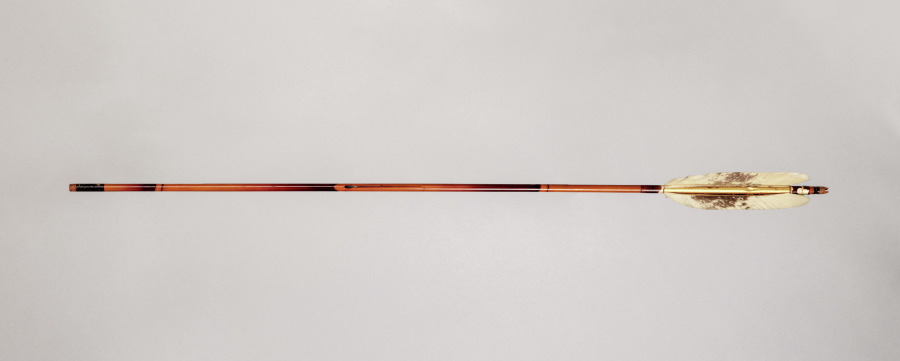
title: Arrow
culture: Japan, Edo period (1615–1868)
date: 1700s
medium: bamboo shaft tipped with wooden point and heeled with pheasant feathers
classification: Arms and Armor